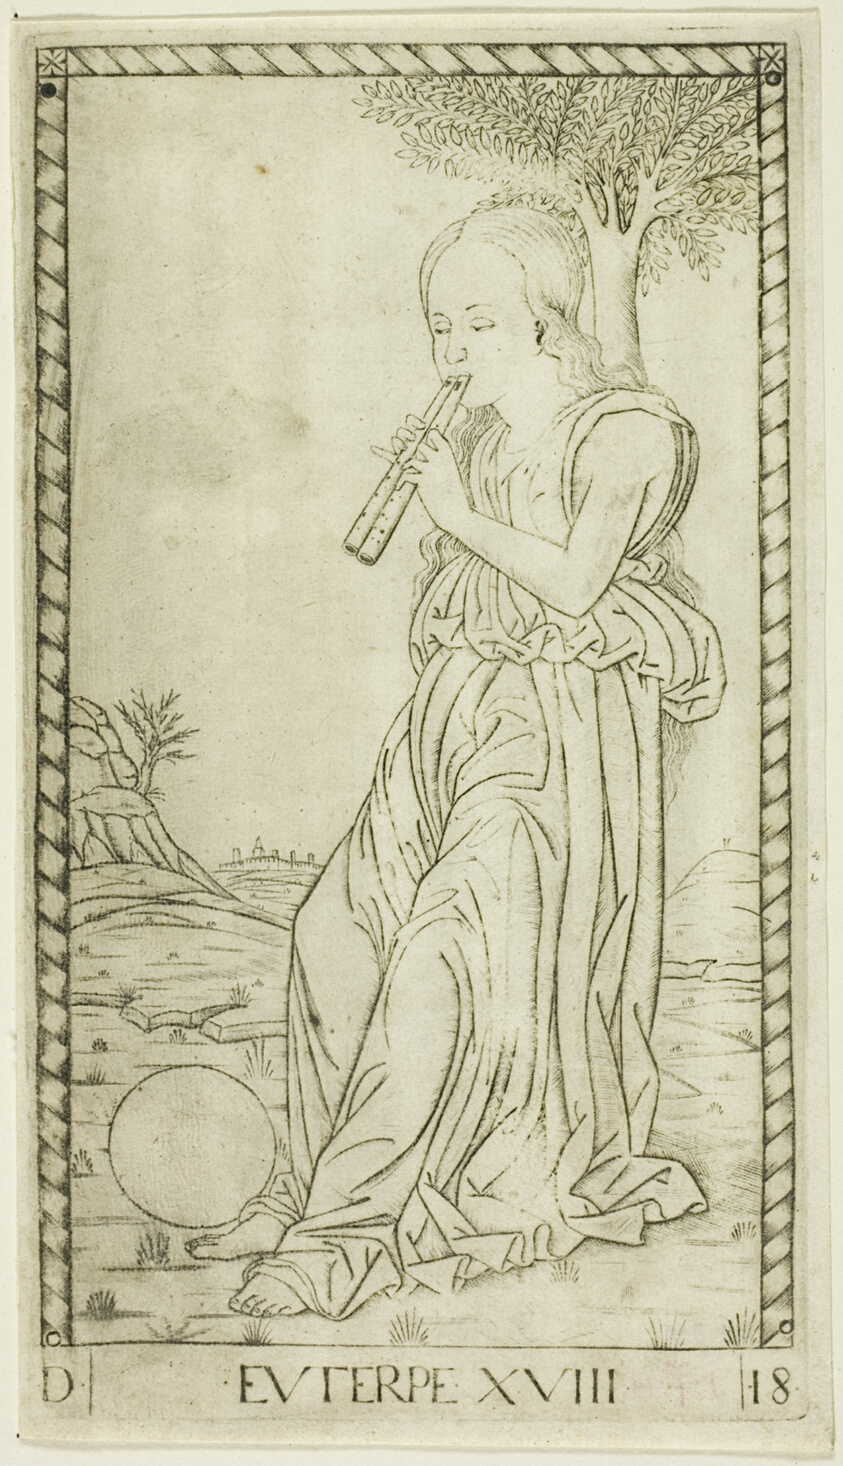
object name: Print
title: Euterpe, plate eighteen from Apollo and the Muses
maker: Master of the E-Series Tarocchi (Italian, active c. 1465)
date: c. 1465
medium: Engraving on paper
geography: Italy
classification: engraving; print; prints and drawing